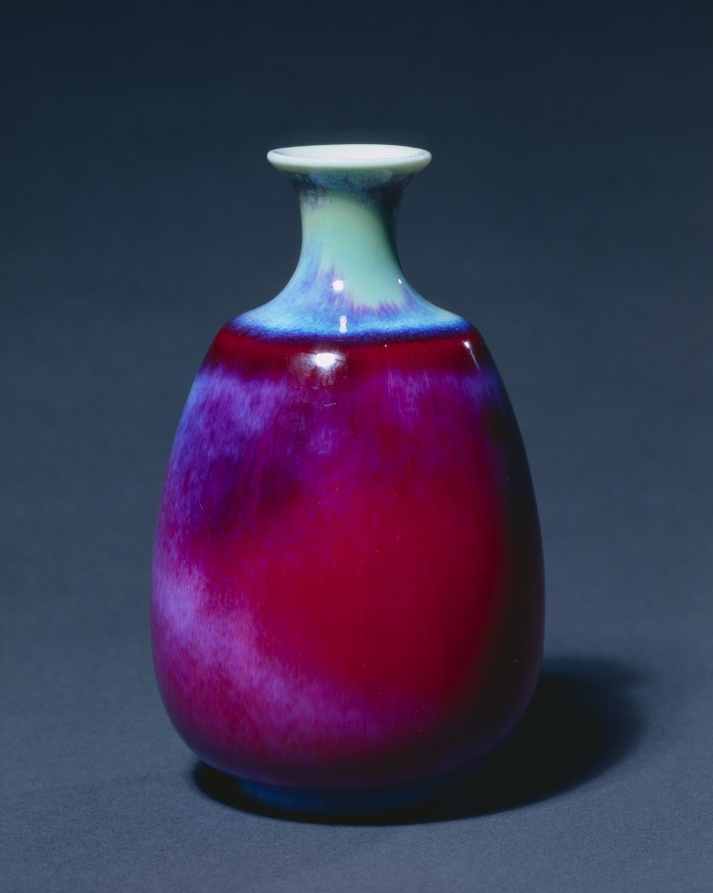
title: Vase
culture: Germany, Berlin, early 20th Century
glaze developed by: Hermann August Seger (German, 1839–1893)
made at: Royal Porcelain Manufactory, Berlin (German)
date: 1900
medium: porcelain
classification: Ceramic